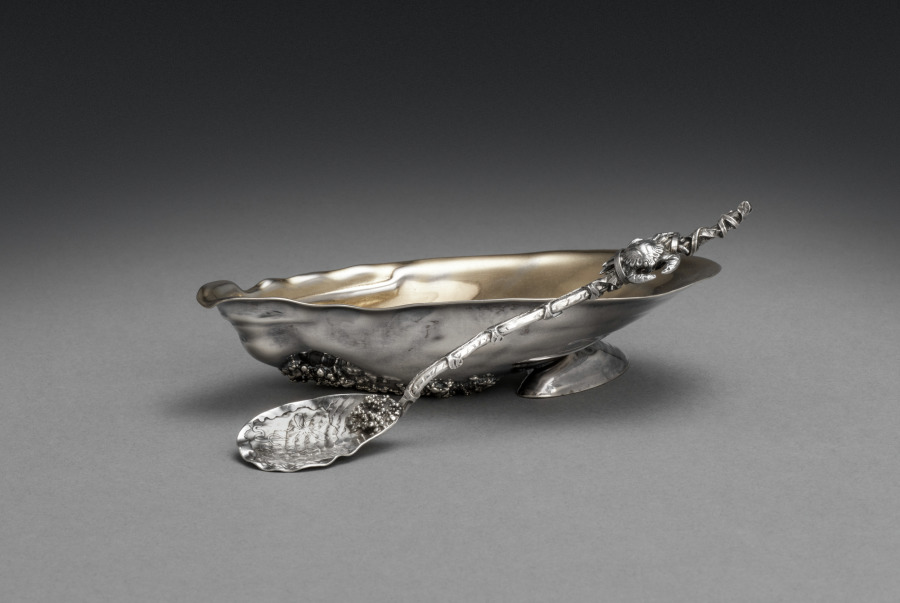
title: Narragansett Salt Cellar and Spoon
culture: America, Rhode Island, Providence, 19th century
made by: Gorham Manufacturing Company (America, est. 1831)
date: 1884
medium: handwrought sterling silver, partially gilt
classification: Silver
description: This small salt dish and spoon reflect the late 19th-century interest in incorporating naturalistic details into the design of useful pieces-in this instance probably inspired by Japanese examples.